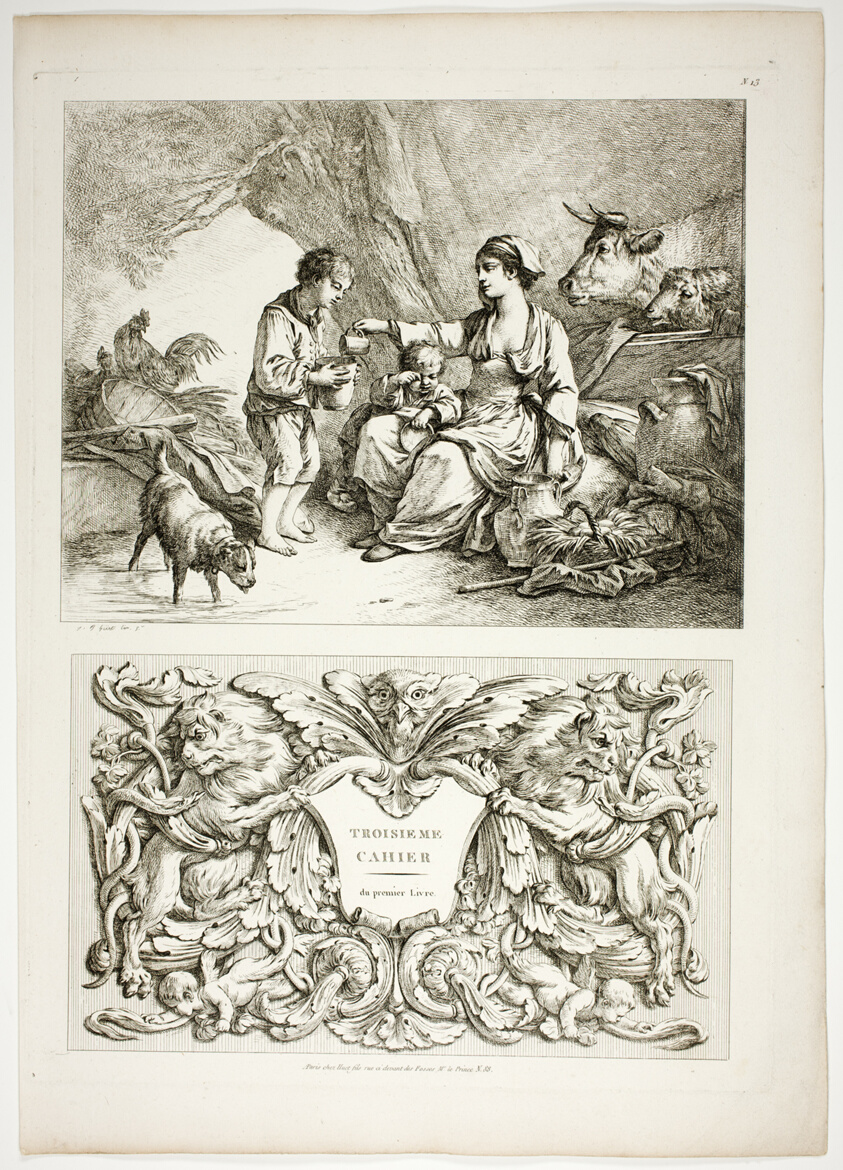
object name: Print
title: Plate Thirteen of 38 from Oeuvres de J. B. Huet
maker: Jean Baptiste Huet (French, 1745-1811)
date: 1796–99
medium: Etching on paper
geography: France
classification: etching; print; prints and drawing